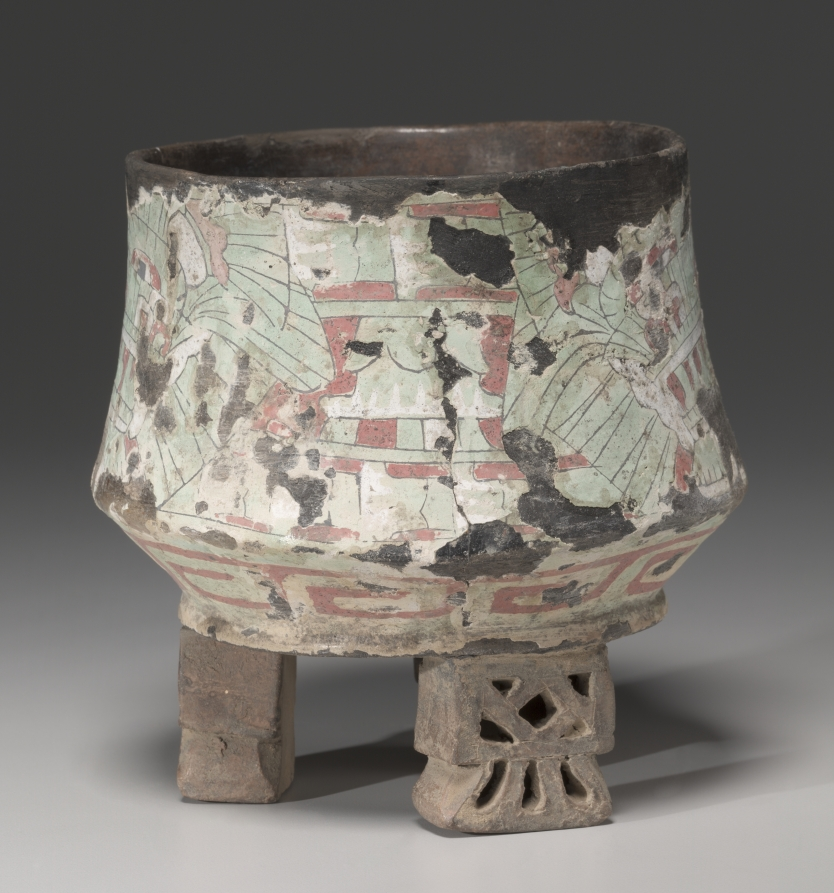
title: Vessel with Butterfly Headdress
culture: Central Mexico, Teotihuacán, Classic period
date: 1–550 CE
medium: ceramic, stucco, pigment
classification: Ceramic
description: The headdress shown on this vessel combines a serpent's mouth with a butterfly's proboscis (feeding tube), which curls between the eyes. The butterfly often appears in the headdress of the Great Goddess, an extremely important Teotihuacán deity. Stucco (paper-thin, painted plaster) is fragile and usually does not survive well; the stucco of the basin in this case has been repaired.